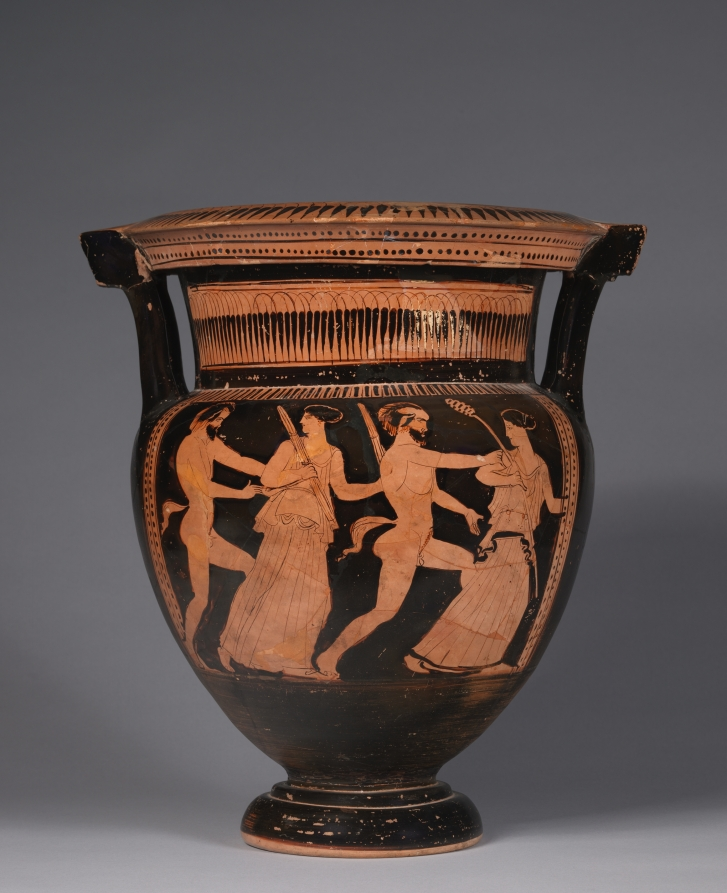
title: Red-Figure Column Krater (Mixing Vessel): Satyrs Pursuing Maenads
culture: Greek, Attic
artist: attributed to Naples Painter (Greek, Attic, active c. 450–430 BCE)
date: 440–430 BCE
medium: ceramic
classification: Ceramic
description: Two satyr-maenad pairs rush across this vase, similar but not identical to one another. The leading satyr is balding and infibulated, the trailing one more hirsute; the leading maenad carries a thyrsos, the trailing one two torches. On the reverse, a stock scene appears, with three youths standing, as if in conversation.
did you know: The column krater takes its name from the column-like struts supporting the handles and rim.